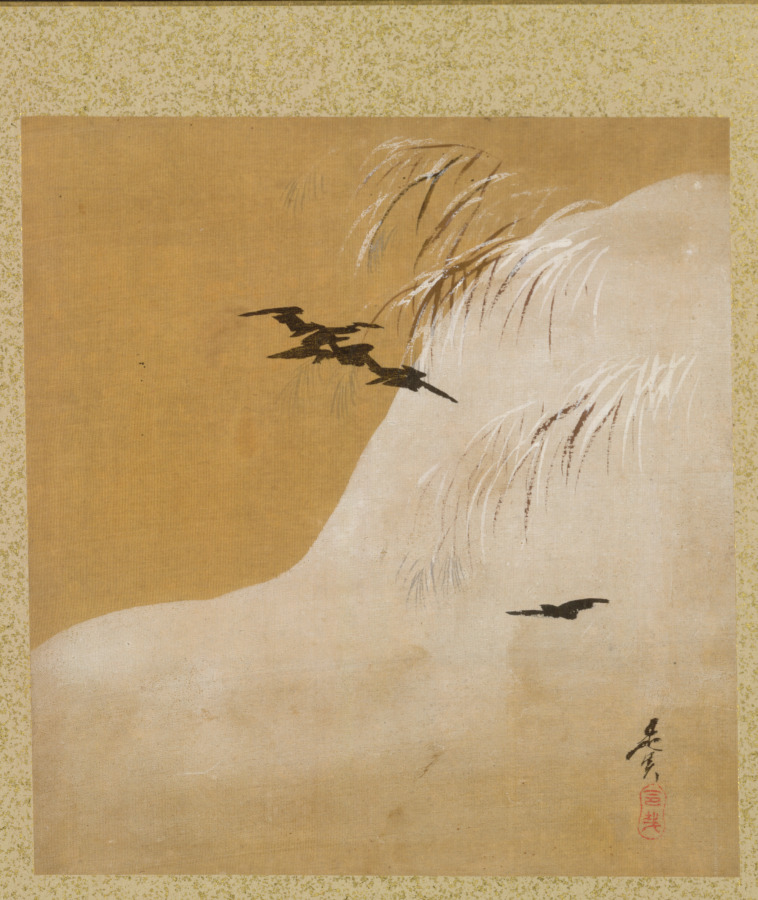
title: Birds in Snow from Album of Paintings by the Venerable Zeshin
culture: Japan, Edo period (1615–1868)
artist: Shibata Zeshin (Japanese, 1807–1891)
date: 1847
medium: leaf in accordion-style album; ink, color, and gold on silk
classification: Bound Volume